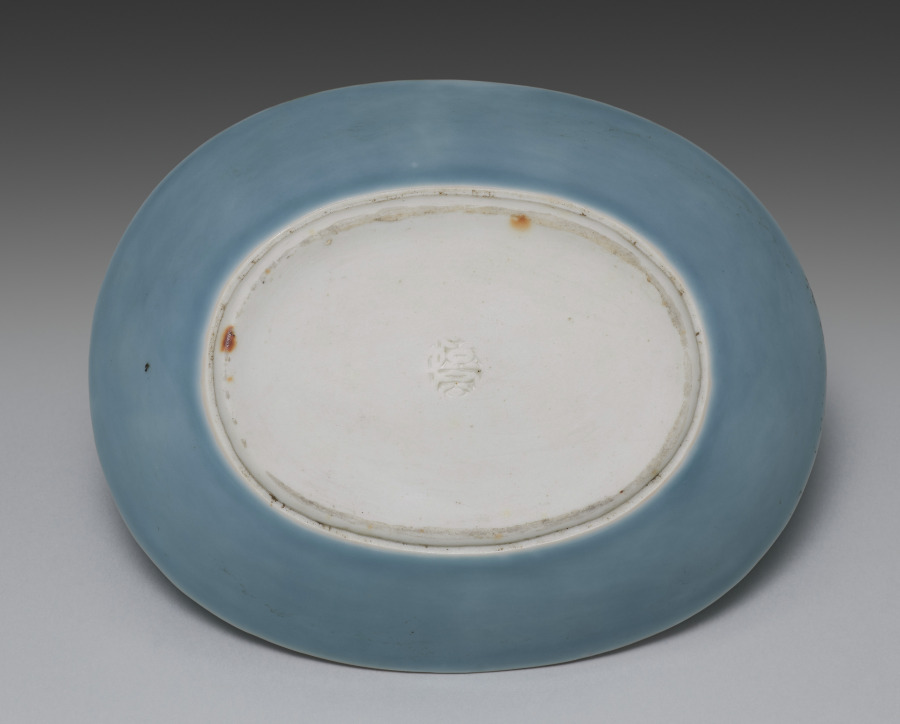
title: Dish from Dishes with Shells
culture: Japan, Taishō period (1912–26)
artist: Seifū Yohei IV (Japanese, 1872–1951)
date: 1914–46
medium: One from a set of five dishes; porcelain with blue glaze, iron oxide, and molded design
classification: Ceramic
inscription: 清風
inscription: 清風造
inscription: 清風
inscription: 成山清風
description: Yohei IV chose an aquatic theme for this set of five mukōzuke, side dishes. He added an iron oxide rim and used a concentrated blue glaze on both the interior and exterior. The glaze, named on the box lid, is his father’s “evening moon” (tsukiyoi) color. The conch in relief takes up the entire bottom of the dish. Up the sides are two snails on one end and on the other a scallop. This results in a boldly graphic, less realistic effect.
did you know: This set of dishes, mukōzuke, could be used for serving small side dishes at a tea gathering.